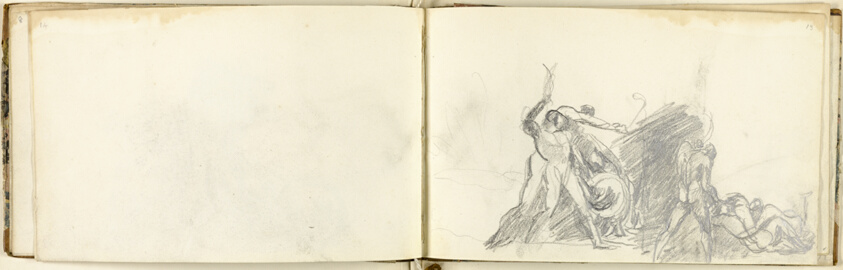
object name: Book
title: Sketchbook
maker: George Romney (English, 1734-1802)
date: 1793/94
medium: Book with eleven graphite drawings on cream wove paper, bound in colored marble paperboard cover with brown leather spine and gold stamps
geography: England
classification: sketchbook; graphite; prints and drawing; book